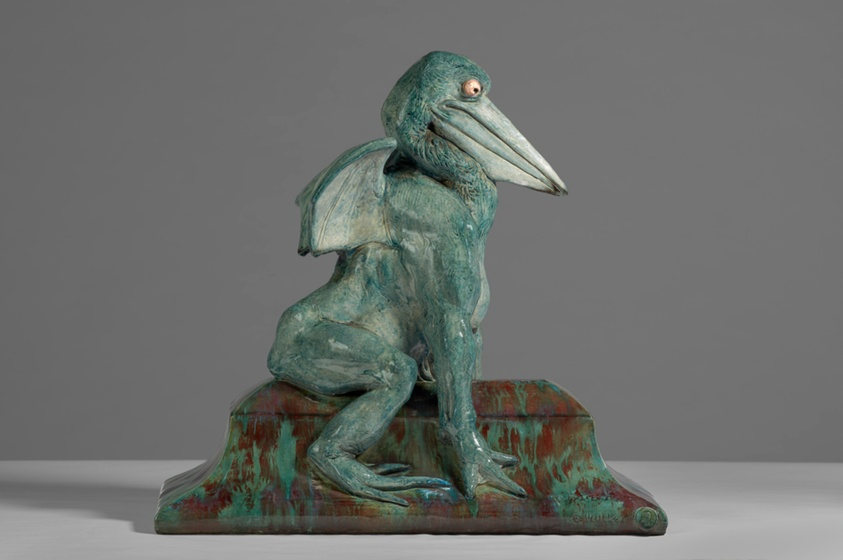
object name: Ceramics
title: Pelican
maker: Emmanuel Fremiet, French, 1824–1910; Made by Émile Muller et Cie, Ivry-sur-Seine, France, 1854–1908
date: c. 1896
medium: Glazed stoneware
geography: France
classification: sculpture; ceramics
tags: mythological figures, animals, bird, pelican, wings